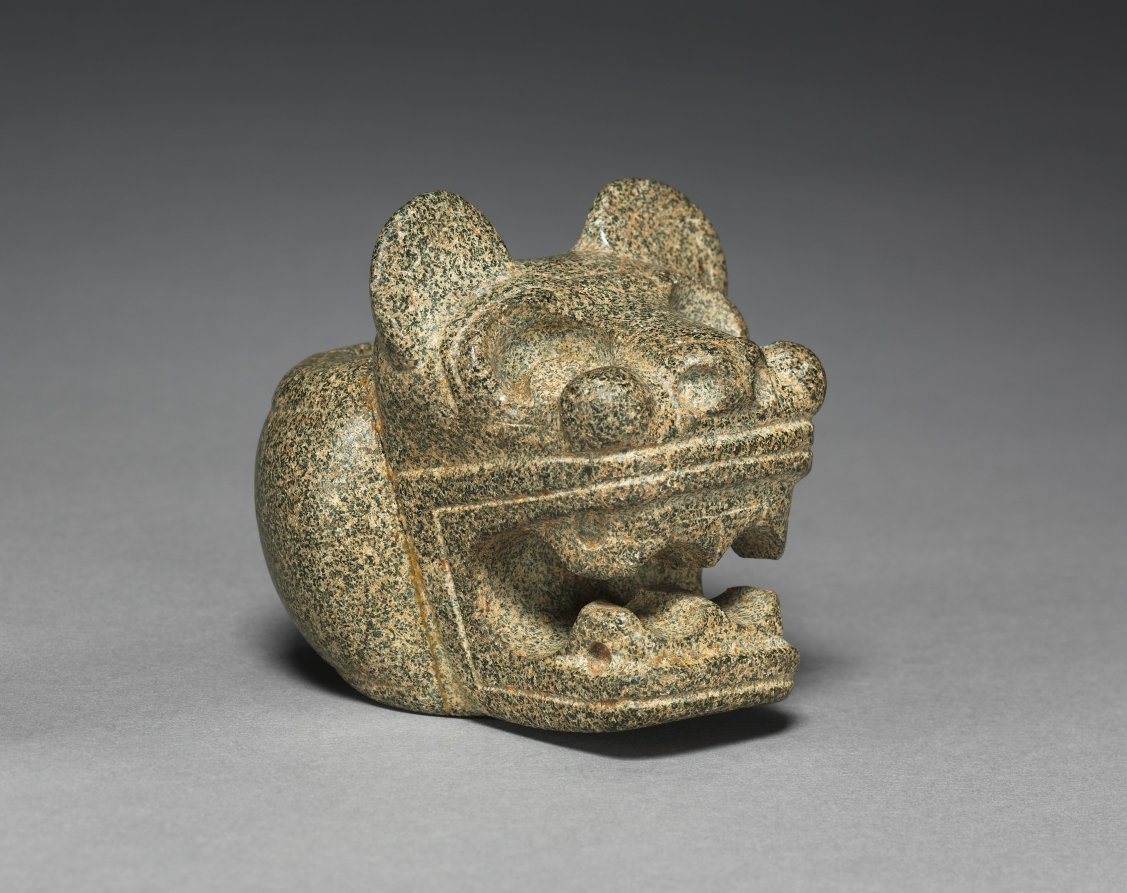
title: Ceremonial Mace (Club) Head: Feline (Jaguar?)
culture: Costa Rica, Southern Nicoya region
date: c. 300 BCE–600 CE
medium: stone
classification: Stone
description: Probably once mounted on wooden shafts, these objects could have served as symbols of chiefly authority, group insignia, the heads of ceremonial weapons, or all three. They eventually were placed in elite graves. The bird may be a male curassow and the feline, a jaguar.